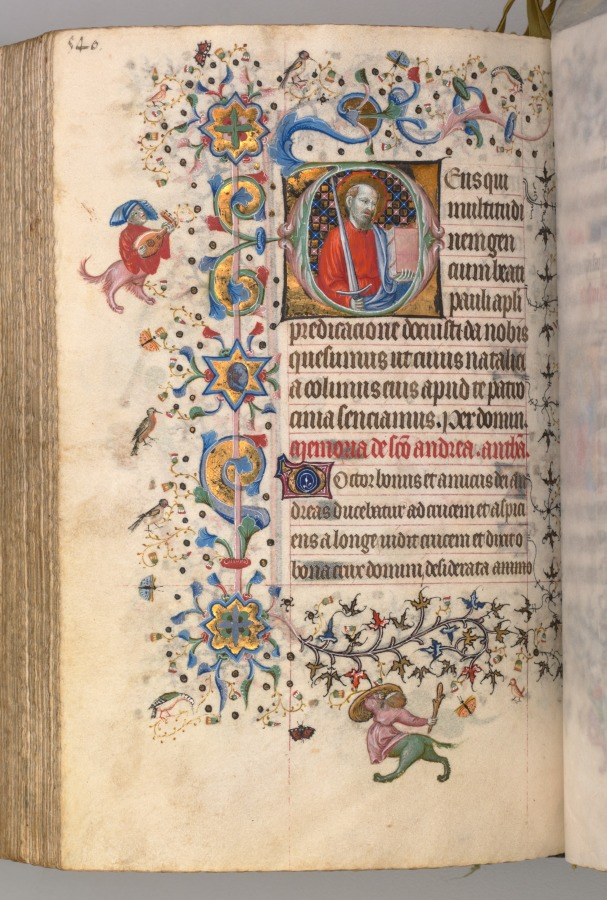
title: Hours of Charles the Noble, King of Navarre (1361-1425): fol. 264v, St. Paul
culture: France, Paris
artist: Master of the Brussels Initials and Associates (French)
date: c. 1405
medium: ink, tempera, and gold on vellum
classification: Bound Volume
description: This precious volume was obviously highly prized by its owner, the French-born King of Navarre, who had his coat of arms painted on no less than twenty folios. Rather than directly commissioning this manuscript from a specific workshop, it seems that Charles the Noble acquired his book of hours -- perhaps ready-made for the luxury market -- while on a trip to Paris in 1404-05. A collaborative effort, six painting styles are evidenced within the pages of this codex, those of two Italians, two Frenchmen, and two Netherlanders. The painter who was responsible for the planning and decoration of the book, and who produced seventeen of the large miniatures, was a Bolognese artist known as the Master of the Brussels Initials. His principal assistant, responsible for most of the borders, was a Florentine who signed his name "Zecho" da Firenze on folio 208 verso.